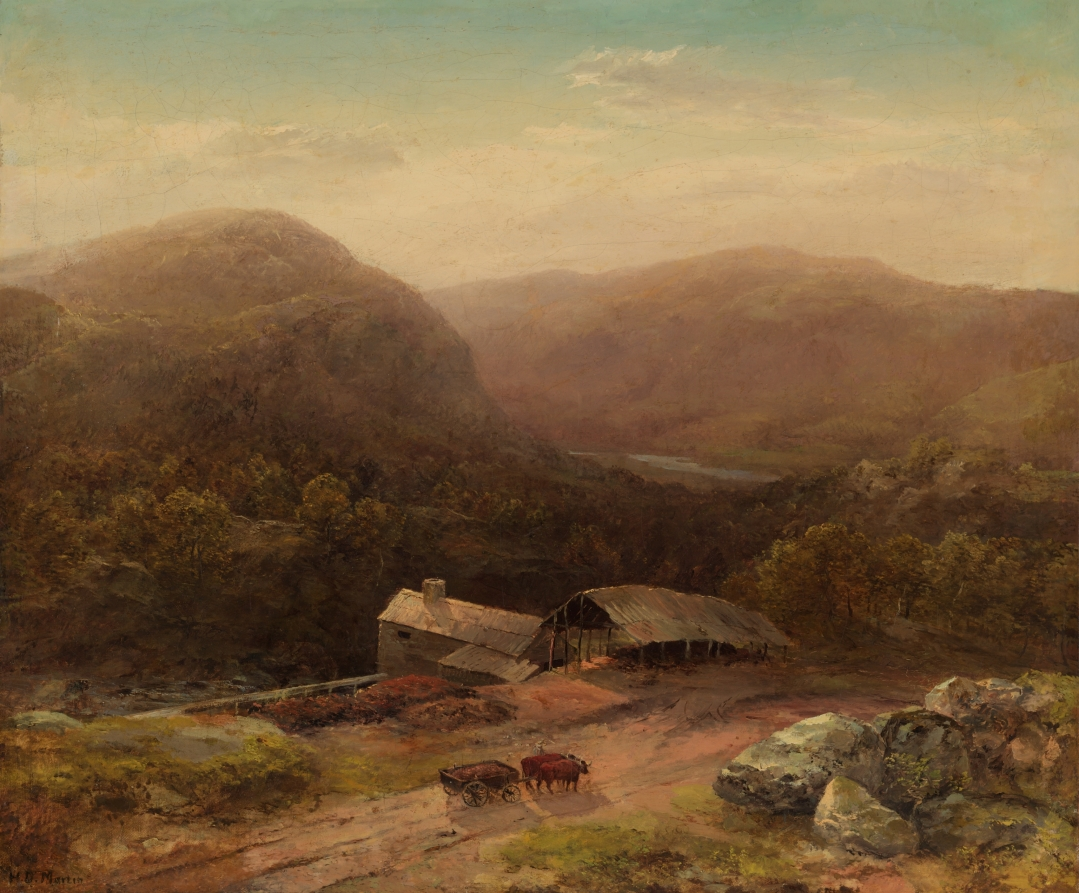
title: In the Housatonic Valley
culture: America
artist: attributed to Homer Dodge Martin (American, 1836–1897)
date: late 1850s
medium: oil on canvas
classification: Painting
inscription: signed lower left: H. D. Martin